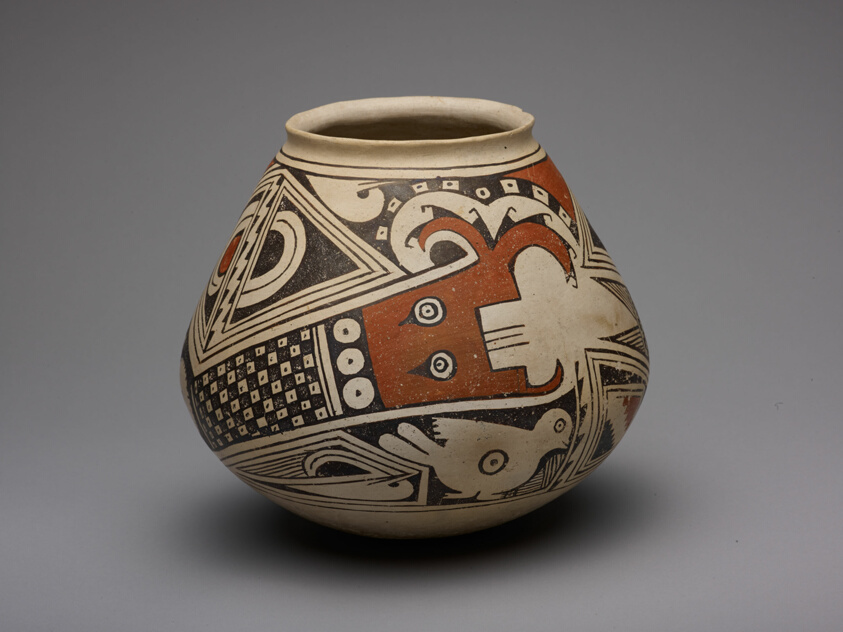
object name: Vessel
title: Jar with Two Plumed or Horned Serpents with Birds and P-shaped Motifs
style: casas grandes, southwest, americas, native american, native north american, Arts of the Americas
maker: Casas Grandes, Ramos Polychrome; New Mexico, United States, or Chihuahua, Mexico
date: 1280–1450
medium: Ceramic and pigment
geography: New Mexico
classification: vessel; ceramics; art of the americas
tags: supernatural, animals, birds, checkerboards, Macaw, serpents, composite, abstract figures